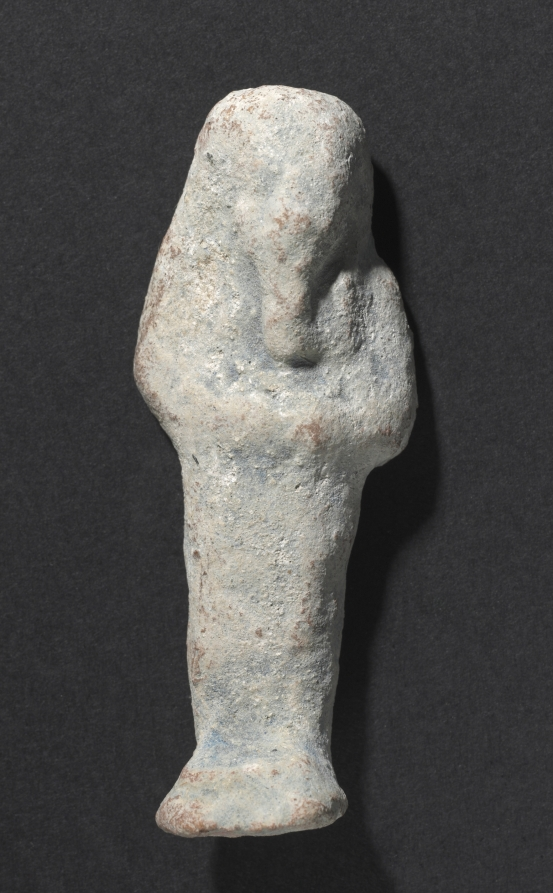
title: Shawabty of Ditamenpaankh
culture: Egypt, Late period (715–332 BCE), Dynasty 25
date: 715–656 BCE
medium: terracotta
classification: Funerary Equipment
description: High demand for shawabtys in the Late Period, a time when as many as 400 or more shawabtys were placed in the tomb with the deceased, gave rise to a specialized container for storing them: the shawabty box. This example is inscribed for the lady of the house, Ditamenpaankh, and was probably one of a pair originally made for her. The single-masted boat on the box's lid is perhaps an allusion to the pilgrimage of the deceased to the holy city of Abydos, the cult city of Osiris, king of the dead. The shawabtys inside are crude, mass-produced examples cast in an open mold. Made of terracotta, their blue paint imitates more costly shawabtys made of faience. As for the shawabty spell, it has been removed from its traditional location on the shawabty's front and relocated onto the sides of box, where it needed only to be written once, thus expediting production.